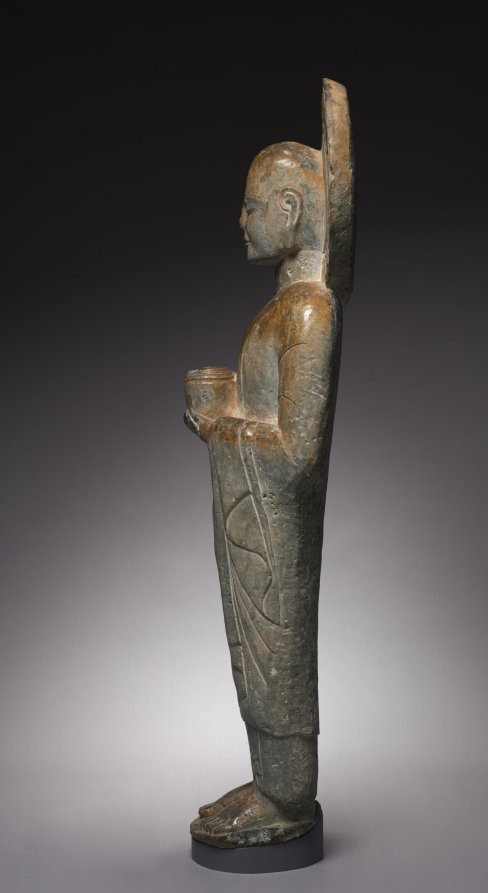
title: Standing Disciple Mahakasyapa Holding a Cylindrical Reliquary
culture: China, Hebei province, Southern Xiangtangshan caves, Northern Qi dynasty (550-577)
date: c. 550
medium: limestone with traces of pigment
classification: Sculpture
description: Mahakasyapa, the disciple of Shakyamuni, is presented with closed eyes in an expression of meditative concentration. He is holding a reliquary for the Buddha’s ashes, which symbolize the Buddha entering final spiritual attainment (nirvana) at death. The artistic simplicity exemplifies the spiritual content of this figure.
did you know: The complex of Buddhist cave temples at Xiangtangshan, “Mountain of Echoing Halls,” is a central achievement of the Northern Qi period.